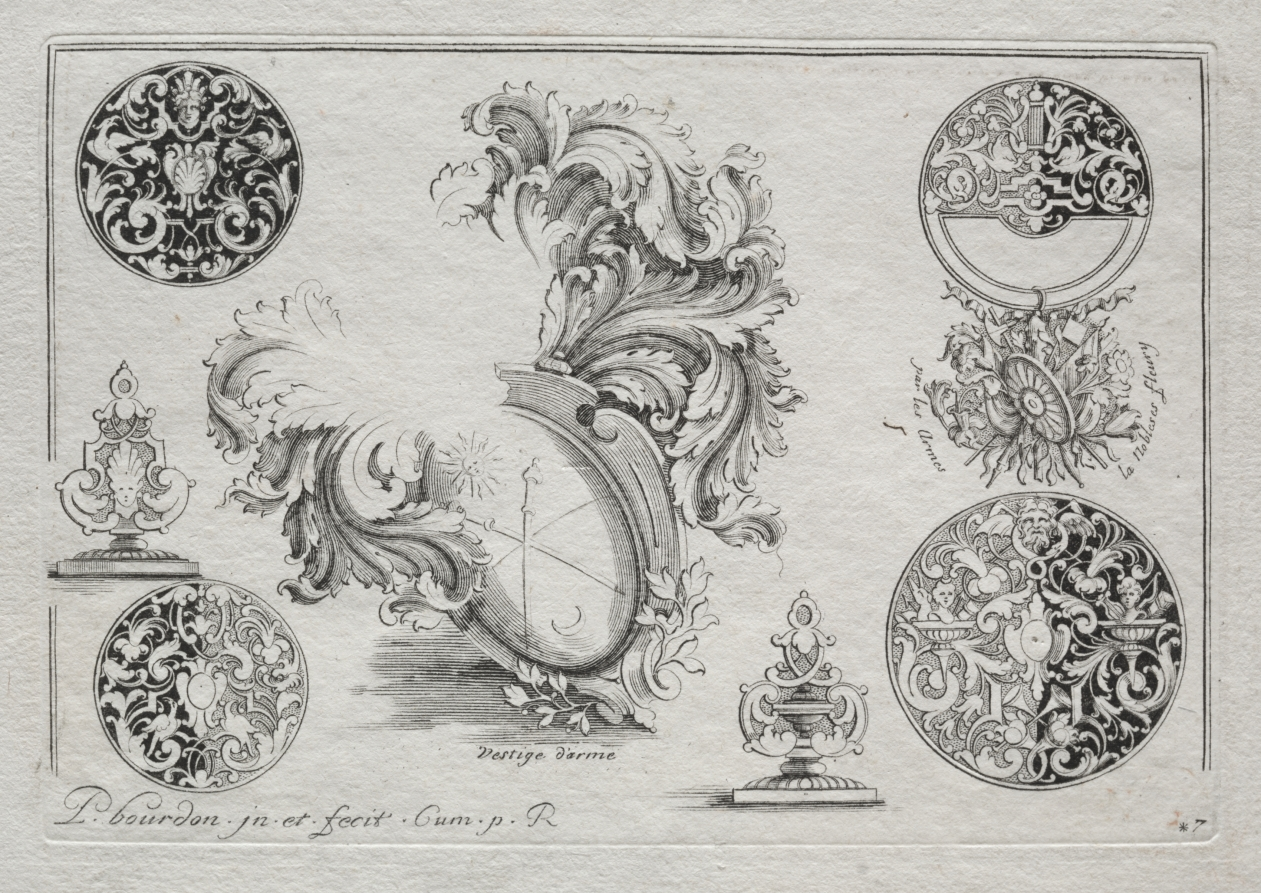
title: # 6 from " Livre second essais de gravjre " second book of Engraved Designs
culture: France, 18th century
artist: Pierre Bourdon (French)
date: c. 1703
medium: etching and engraving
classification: Print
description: The title page for this set of prints suggests that Bourdon’s designs are “useful for clockmakers, goldsmiths, chiselers, engravers and other people.” These craftsmen who made ornamented objects, such as the boxes and pistol below, sometimes consulted printed designs for inspiration. However, pattern prints similar to Bourdon’s also catered to aristocrats and wealthy professionals who pursued knowledge about styles and artists as a form of entertainment.